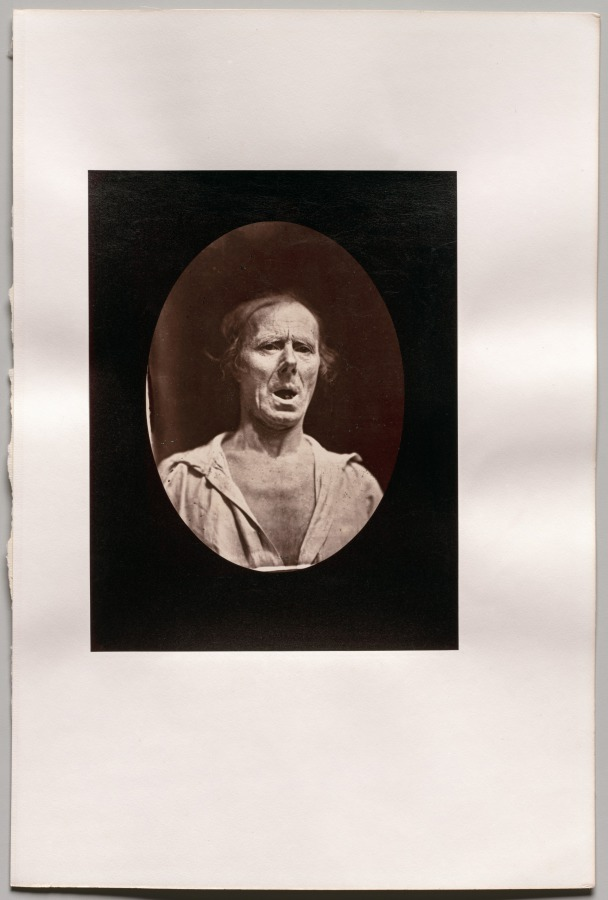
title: Figure 54: Abaissement volontaire de la mâchoire inférieure: mouvement inexpressif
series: Mécanisme de la physionomie humaine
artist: Guillaume-Benjamin-Amand Duchenne (de Boulogne) (French, 1806–1875)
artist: Adrien Tournachon (French, 1825–1903)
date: c. 1856, printed 1862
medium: Albumen print from glass plate negative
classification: Photograph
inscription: On the verso, lower left, in graphite, “fig 54”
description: Duchenne described this model, a former shoemaker, as “an old, toothless man, with a thin face, whose features, without being absolutely ugly, approached ordinary triviality.” When criticized for using such an unattractive model, Duchenne held him up as proof that “every human face could become spiritually beautiful through the accurate rendering of his or her emotions.”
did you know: Duchenne, a neurologist at a hospital for the poor in Paris, turned to photography to record the grammar of human expression.